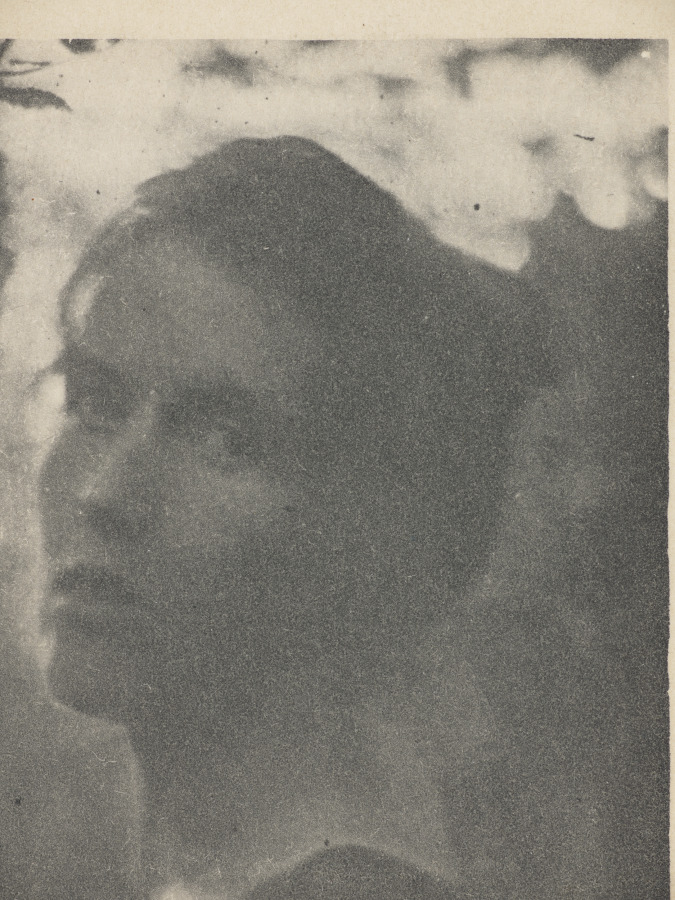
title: The Edge of the Wood - Evening (Letitia Felix)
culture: America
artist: Clarence H. White (American, 1871–1925)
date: 1900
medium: photogravure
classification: Photograph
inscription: Written in pencil on recto: "Clarence H. White [signed] '00"; in pencil on verso: " 'The Edge of the Wood-Evening'- / Clarence H. White"; in pen on verso: "Letitia Felix"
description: Clarence H. White experimented with an array of artistic media that blurred the lines between photography, drawing, and printmaking. Here are two examples of that experimentation: a platinum print on the left and a photogravure on the right. White was likely drawn to both processes for their broad tonal range and interaction of image and paper. To create platinum prints, a light-sensitive liquid emulsion is applied to and absorbed by the paper. The image forms within the paper’s fibers, resulting in a matte appearance. Because photogravures are printed like an etching, the image is formed with ink impressed onto the paper’s surface.